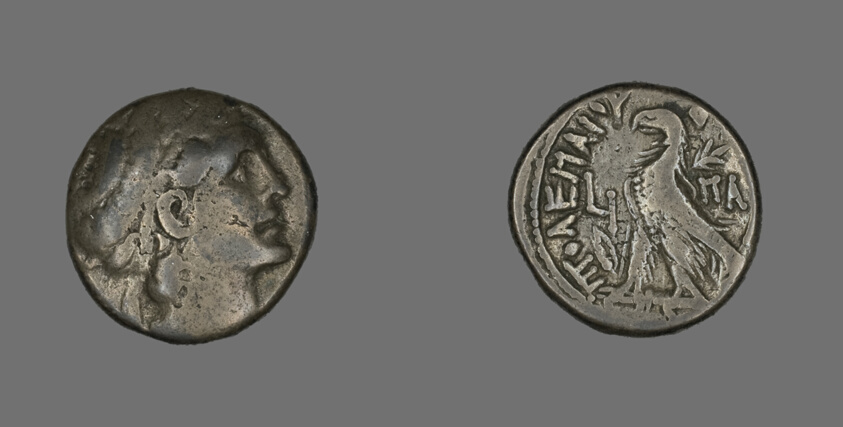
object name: Coin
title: Tetradrachm (Coin) Portraying King Ptolemy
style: ptolemaic, ancient, greek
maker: Greek, Ptolemaic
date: 367-284 BCE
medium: Silver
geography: Ancient Greece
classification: coin; ancient art